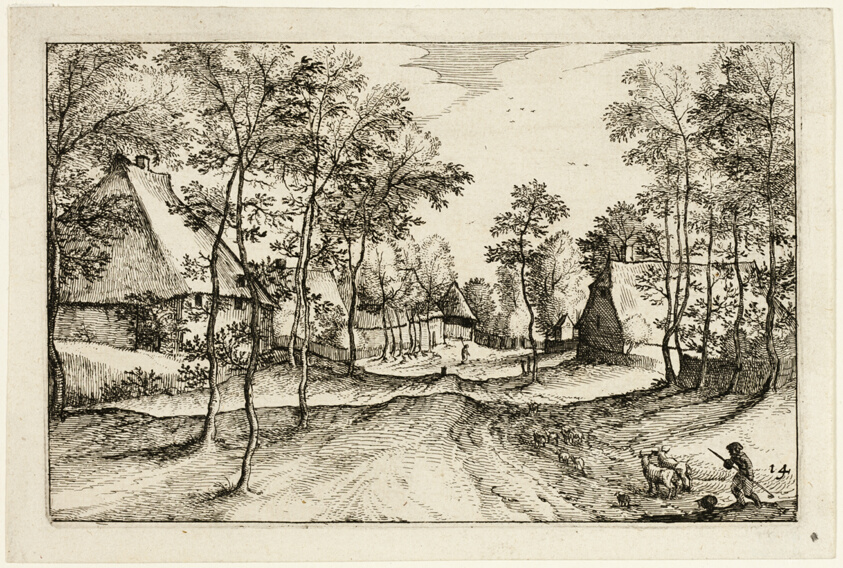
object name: Print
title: Village Road, plate fourteen after Pictures of Farms, Country Houses and Rustic Villages (Praediorum villarum et rusticarum casularum icones)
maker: Claes Jansz. Visscher (Dutch, 1587-1652); after Unknown Flemish Artist, misidentified as Pieter Bruegel, the elder (Flemish, 1525/30-1569)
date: 1612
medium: Etching in black on ivory laid paper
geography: Netherlands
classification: etching; print; prints and drawing